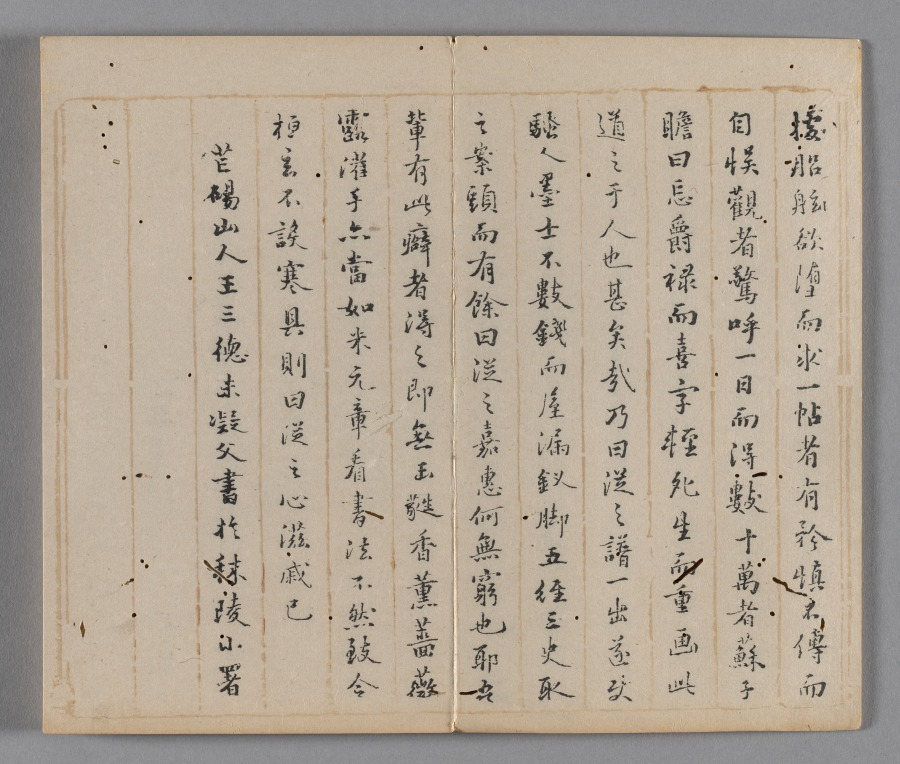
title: Ten Bamboo Studio Painting and Calligraphy Handbook (Shizhuzhai shuhua pu): Miscellaneous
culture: China, Qing dynasty (1644-1911)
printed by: Hu Zhengyan (Chinese, c. 1584–1674)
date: 1633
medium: Woodblock-printed book; ink and colors on paper; first edition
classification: Print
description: Color printing reached a level of perfection in the early 1600s, as seen in this Ten Bamboo Studio Collection of Calligraphy and Painting and the Mustard Seed Garden Manual of Painting (printed 1679 and 1701). The painterly quality, precision in registering (aligning) the woodblocks, and harmonious colors made them the most successful color print editions in Chinese history. Both editions were printed and compiled in Nanjing, spread nationwide, and had a great impact on the arts in Japan and Korea.